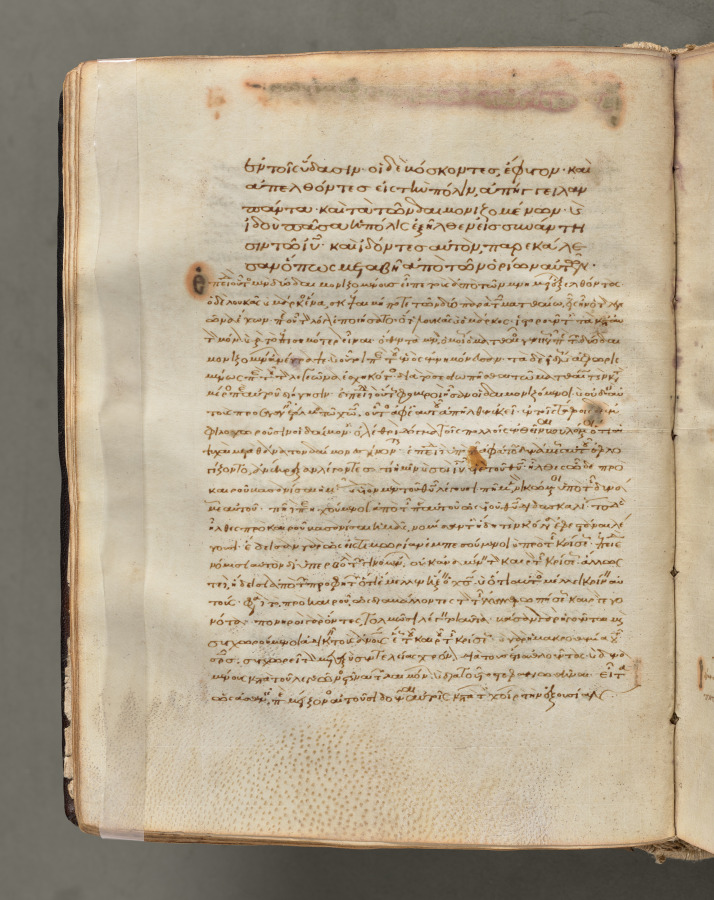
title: Text, folio 36 (verso), from a Gospel Book with Commentaries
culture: Byzantium, Constantinople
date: c. 1000–1100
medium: ink, tempera, and gold on vellum; leather binding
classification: Bound Volume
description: Each of the four gospels in this book opens on a page with brilliantly illuminated borders depicting the author of the text as well as birds—principally peacocks, symbols of the immortality of the soul—and fountains, representing the fountain of life and the salvation of the soul. This volume consists of 428 leaves with texts in Greek. Its level of sophistication suggests that it was probably written and decorated in a monastery in Constantinople.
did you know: Gospel Books were carried in procession through Byzantine churches.